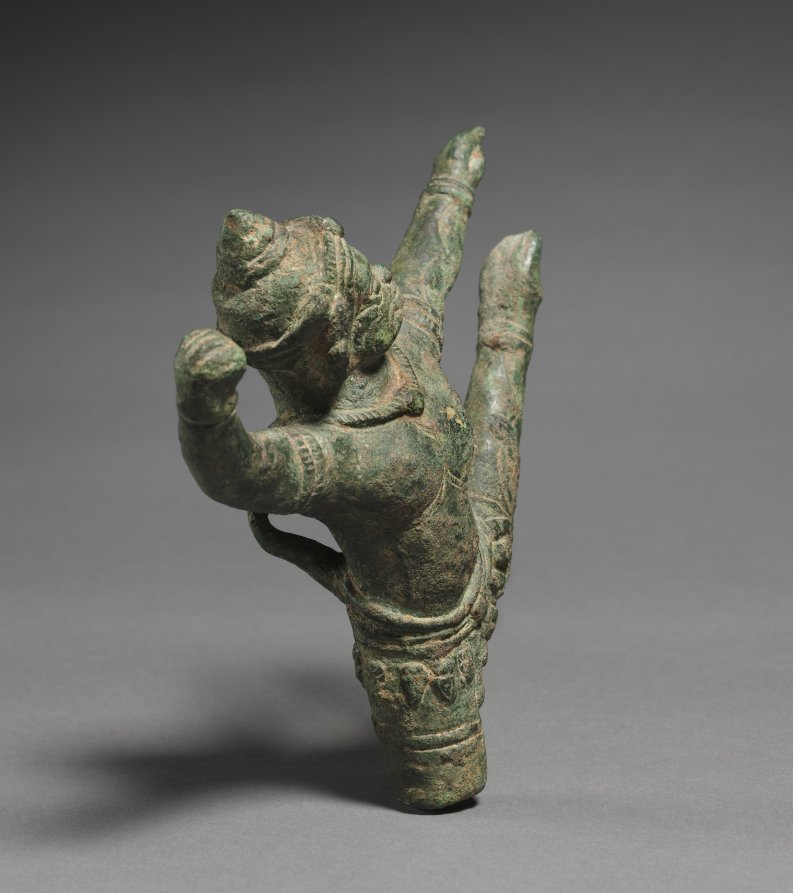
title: Hanuman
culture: Cambodia, Angkor, Bayon style, 12th Century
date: 1100s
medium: bronze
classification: Sculpture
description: When posed in this powerful and exuberant manner, the image of Hanuman stood at the top of a standard. As the son of the wind god and the most powerful of the primeval forest-dwellers, who are depicted with the head and tail of a monkey and the body of a man, Hanuman as an emblem spelled success in battle.